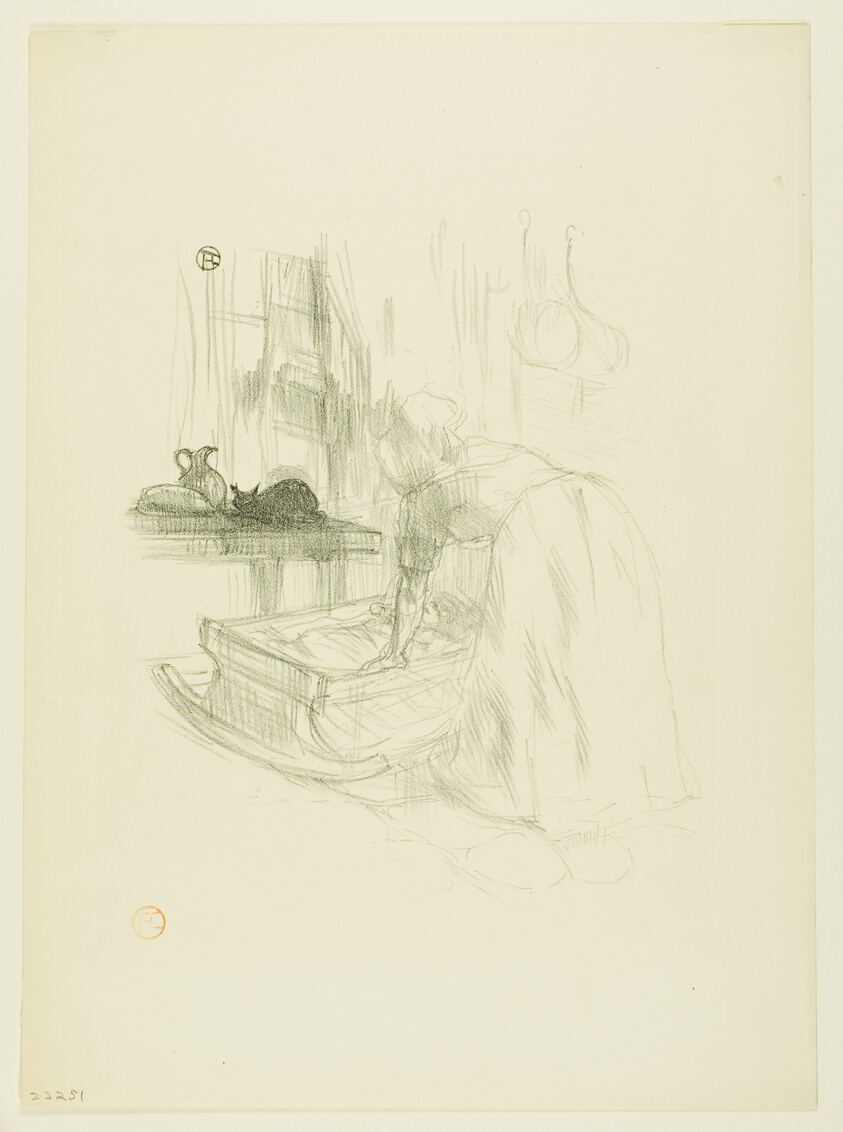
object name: Print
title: Lullaby, from Mélodies de Désiré Dihau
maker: Henri de Toulouse-Lautrec (French, 1864-1901)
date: 1895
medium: Lithograph on cream wove paper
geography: France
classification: lithograph; print; prints and drawing